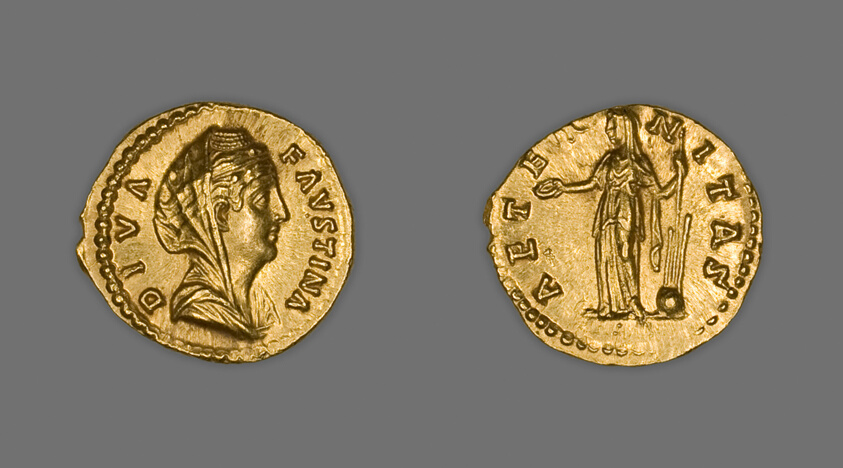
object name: Coin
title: Aureus (Coin) Portraying Empress Faustina the Elder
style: imperial (roman), ancient, roman (ancient, style or period)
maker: Roman, minted in Rome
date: 141-161, issued by Antoninus Pius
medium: Gold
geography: Roman Empire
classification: coin; gold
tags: portraits